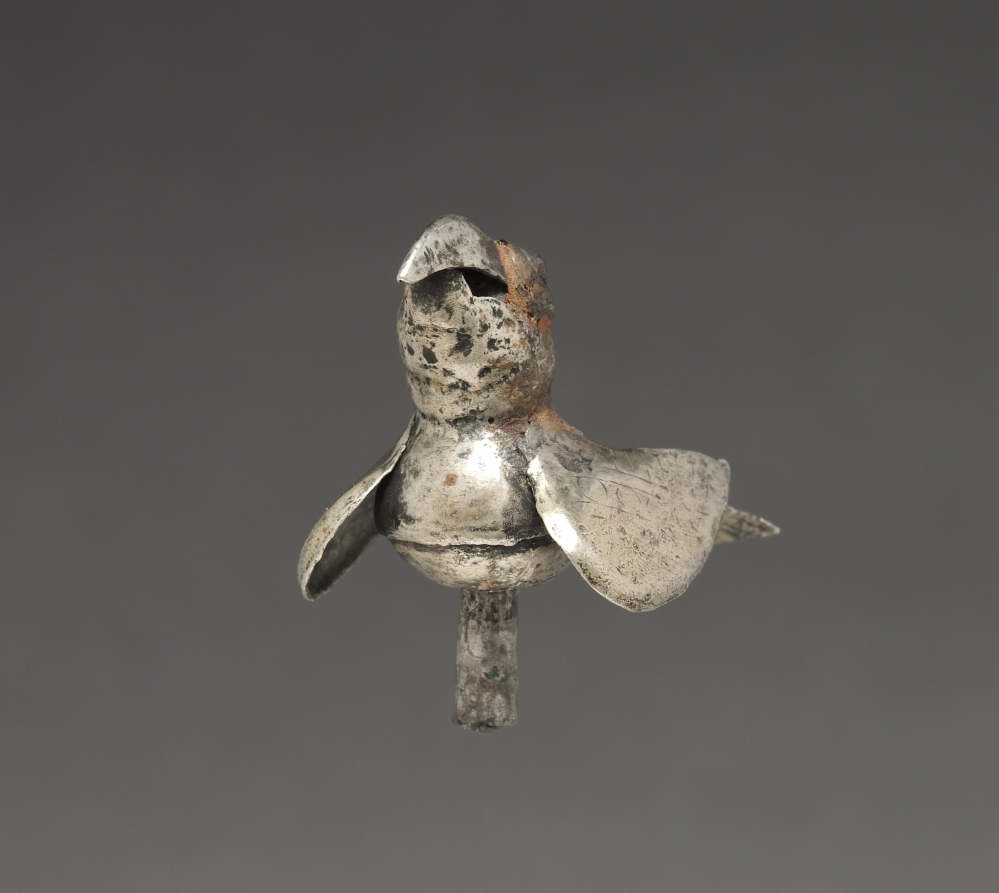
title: Macaw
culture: Peru, North Coast, Sicán or Chimú, 9th-15th Century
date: c. 800–1470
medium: gold alloy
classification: Metalwork